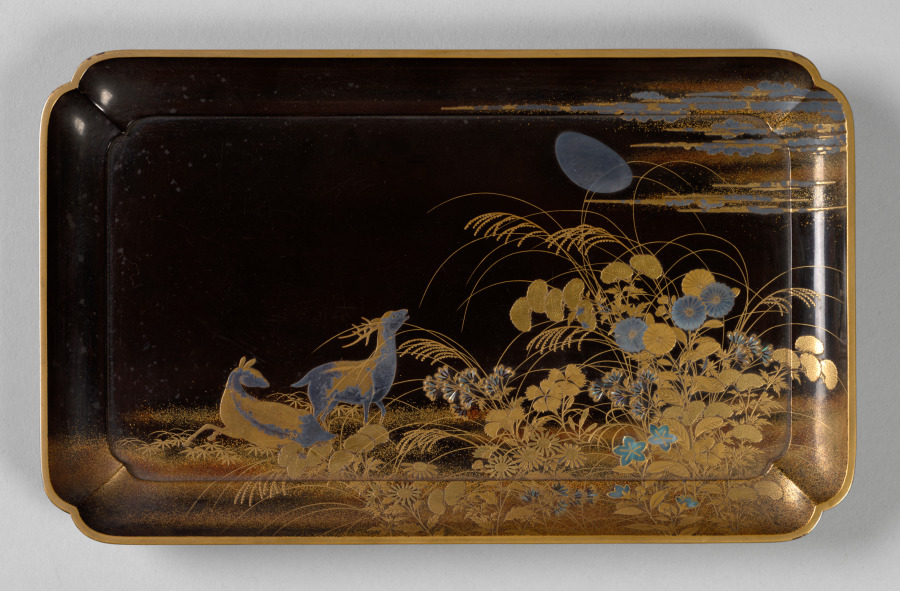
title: Ten-Round Incense Game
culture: Japan, Edo period (1615–1868)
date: 1700s–mid-1800s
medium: Lacquered wood with gold and silver sprinkled powder (maki-e) and mother-of-pearl inlay, metal fittings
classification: Lacquer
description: A popular pastime in the Edo period was a game in which a group of players passed around incense and guessed its name or scent. Small pieces of incense would be placed on thin mica plates and heated over hot ash, releasing their aroma for the players to smell. Players then cast their guesses with playing pieces. The game master kept score with the writing set. This game is handsomely decorated with images of deer in an autumn setting.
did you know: The blue and white porcelain containers in which the heated incense was passed feature designs of foreigners.